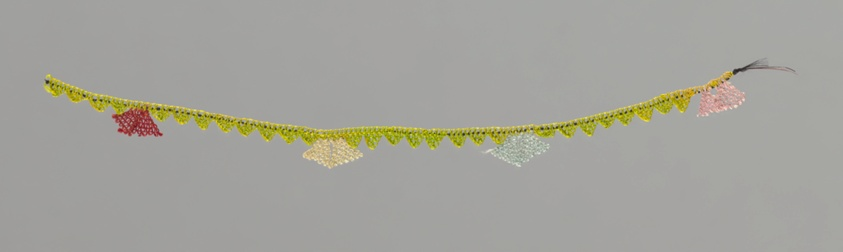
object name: Textile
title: Edging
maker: Eastern Mediterranean, probably Cyprus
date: 1875/1900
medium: Silk, horsehair, and cotton, needle lace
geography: Eastern Mediterranean Region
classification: textile; lace - needle